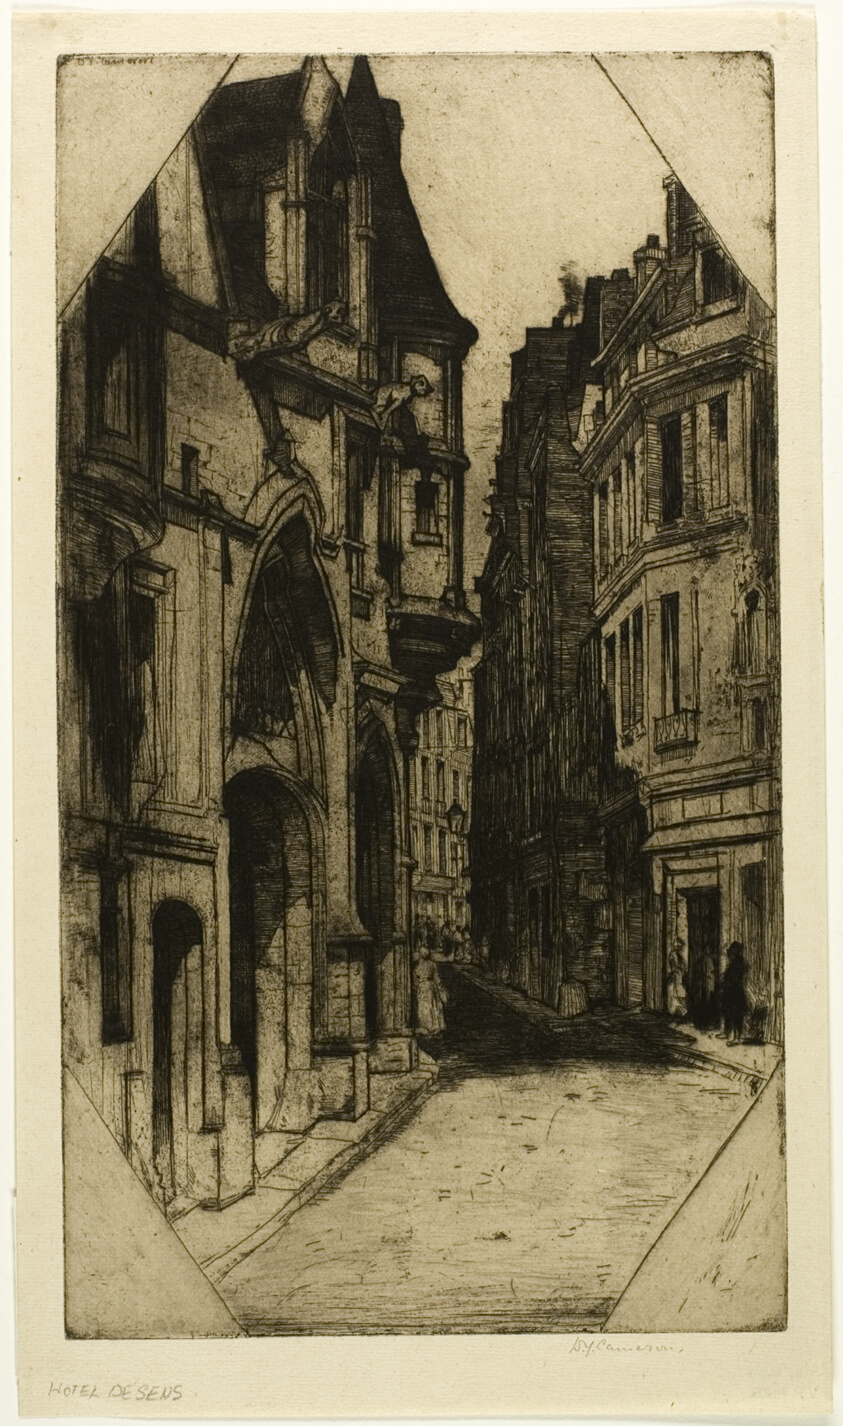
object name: Print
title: Hôtel de Sens, plate three from the Paris Set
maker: David Young Cameron (Scottish, 1865-1945)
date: 1904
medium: Etching and drypoint on cream laid paper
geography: Scotland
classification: etching; print; prints and drawing